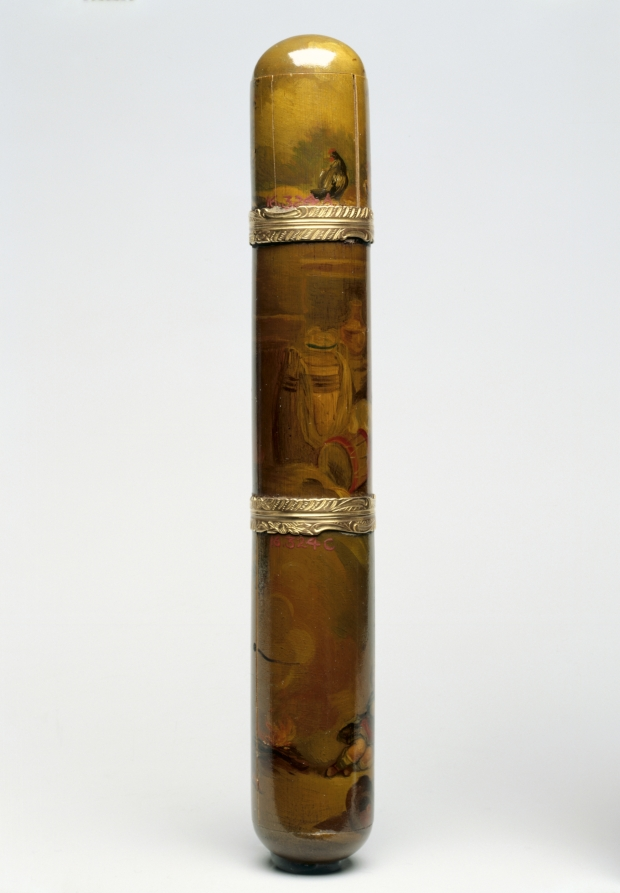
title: Perfume Case (Etui flaconnier)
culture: France, 18th century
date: c. 1780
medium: painted wood with gilt metal mounts, tortoiseshell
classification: Cosmetic Objects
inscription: Unmarked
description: Resting inside this case is a small octagonal crystal flask that would have held perfume. The painted miniatures are decorated with vernis martin, a popular varnish that imitated East Asian true lacquer. These scenes of rural merriment were often miniature reproductions of well-respected artists of the period. The depiction of three children and a dog on the lower portion of the case was drawn from Jean-Honoré Fragonard’s The Happy Family (L’heureuse fécondité) (1777).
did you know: Perfume was an important part of the French toilette, a lengthy ritual of washing and dressing practiced by members of the French social elite.